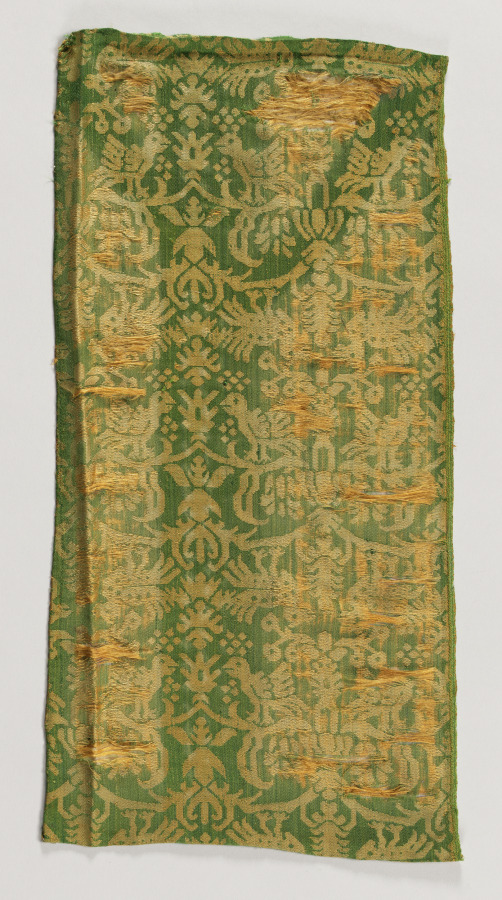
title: Fragment of Silk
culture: Spain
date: early 1600s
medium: silk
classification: Textile